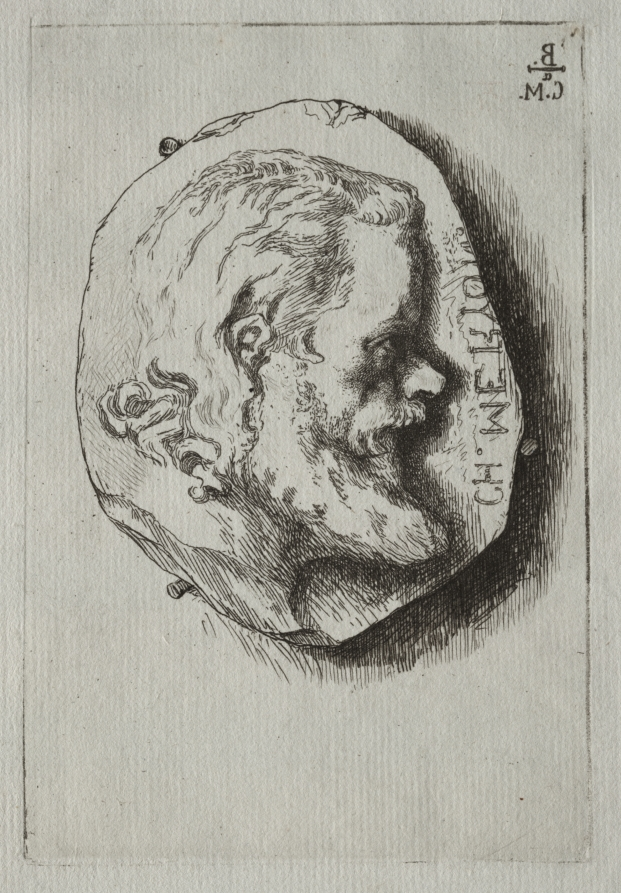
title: Charles Meryon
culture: France, 19th century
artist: Félix Bracquemond (French, 1833–1914)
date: 1854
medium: etching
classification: Print